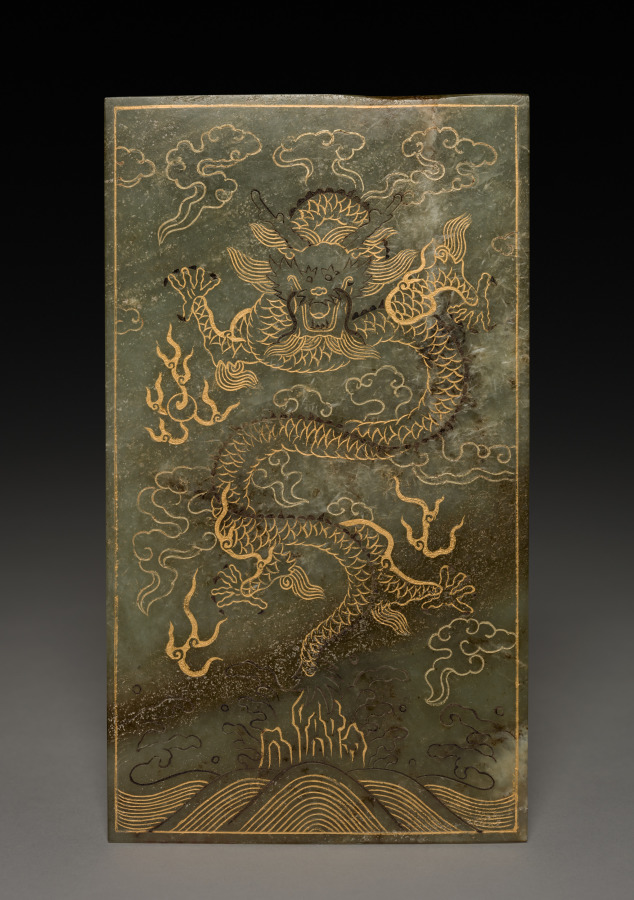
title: Tablet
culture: China, Qing dynasty (1644–1911), Qianlong reign (1736–95)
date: 1778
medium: jade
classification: Jade